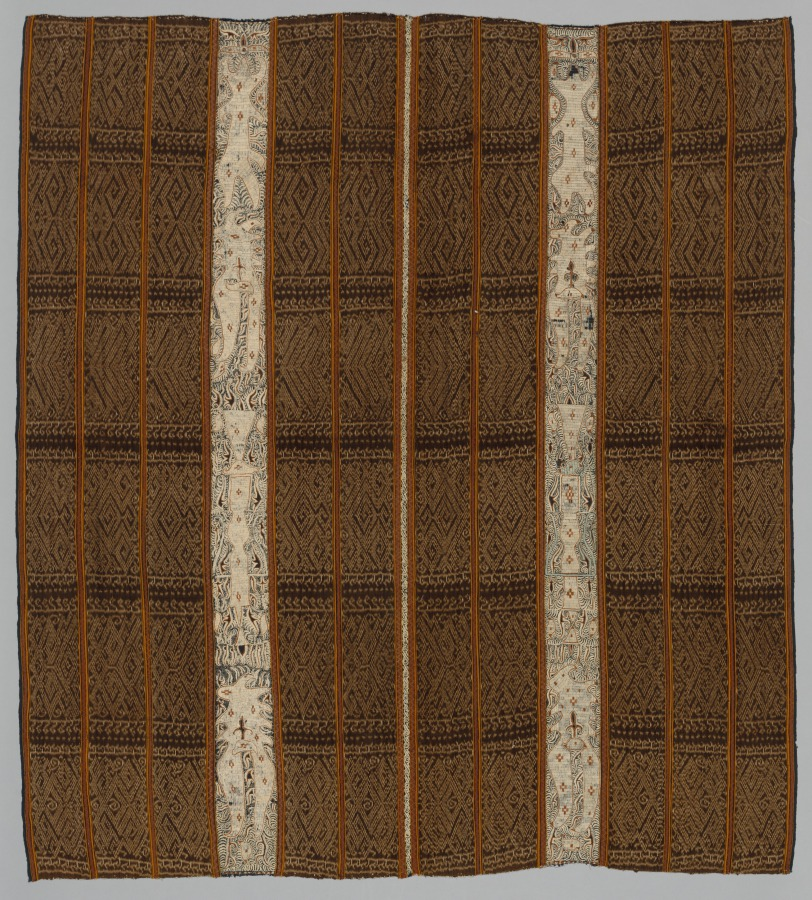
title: Tapis (Garment)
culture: Indonesia, Sumatra, Lampung, 19th century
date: 1800s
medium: tabby weave, warp ikat; cotton / embroidery; silk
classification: Textile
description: "Tapis" from central and southern Sumatra combine warp ikat with embroidery. The angular, geometric designs of the warp ikat can be traced back to the bronze age culture of China. During the first millennium B.C., elements of that culture spread to Indonesia where they survived in remote areas well into the 20th century. Completely different are the mysterious, curvilinear forms of the embroidered bands. Some of these have become too abstracted to identitfy; but others can be recognized as human figures wearing the feathered and horned headdresses of head-hunting rituals. Embroidery designs were presented by a man to his prospective bride, and their motifs were inspired by activities specifically performed by men, such as wood carving, metalwork, and headhunting.